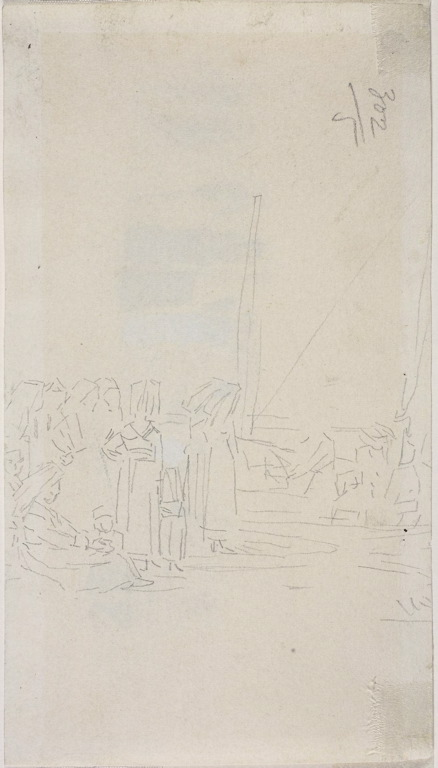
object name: Drawing and Watercolor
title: Breton Women on the Beach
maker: Eugène Louis Boudin (French, 1824-1898)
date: 1867/68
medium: Graphite on off-white wove paper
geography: France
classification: drawings (visual works); prints and drawing